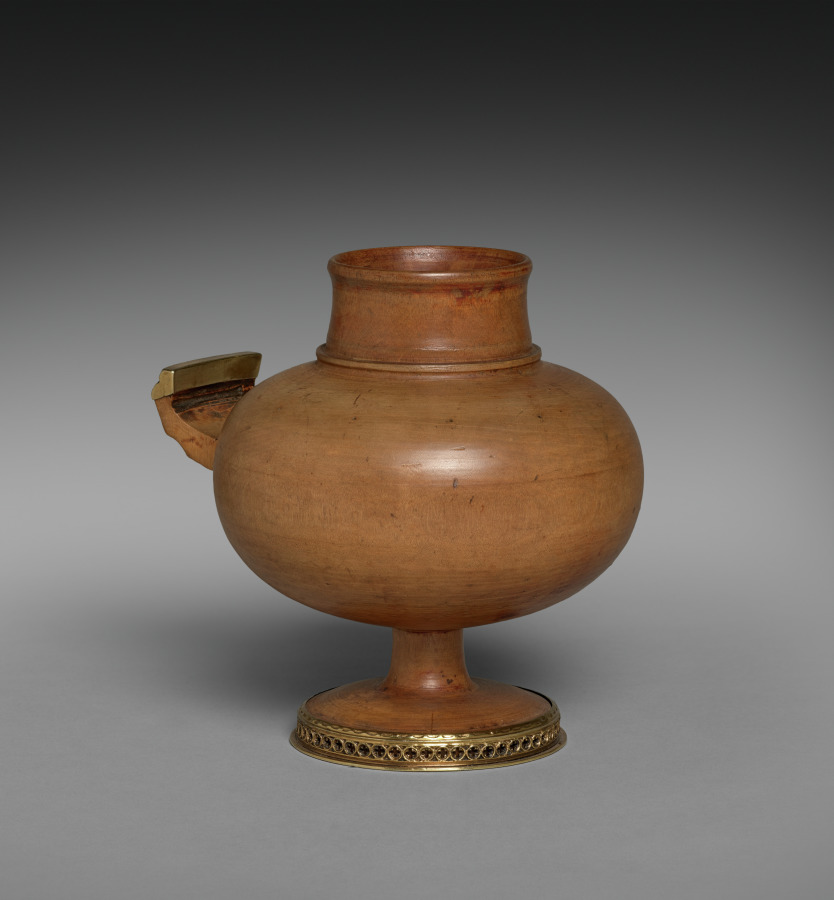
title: Double Cup (Mazer)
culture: Germany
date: c. 1530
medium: maple wood with gilt-silver mounts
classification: Wood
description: A characteristic form of drinking vessel made of close-grained wood, especially maple, was developed in Germany as early as the thirteenth century. It consisted of a larger cup with a foot and a handle and a smaller cup on top. The upper one served as a lid but could also be removed and used as a separate drinking vessel. In this example the smaller upper cup is inset with a memorial portrait medallion of Albrecht Dürer made in the year of his death, 1528. The medal is the work of Matthes Gebel who was active in Nuremberg and Augsburg as a medallist from 1523 to his death in 1574. The reverse of the medal is set into the base of the larger lower cup.